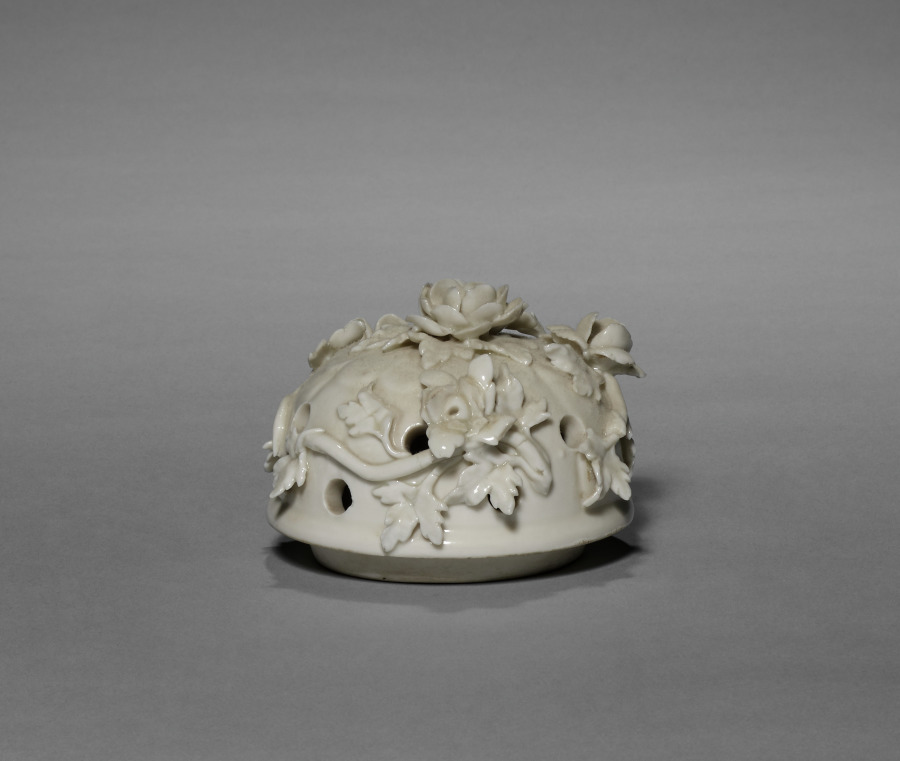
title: Potpourri Vase with Cover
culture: France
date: c. 1860–80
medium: blanc-de-chine porcelain; gilt bronze mount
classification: Ceramic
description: This vase was likely made by the celebrated Parisian ceramics firm of Edmé Samson (1810–91). To cater to the resurgence in taste for 18th-century designs, the Samson firm specialized in making reproductions of rare 18th-century European porcelains, especially those from firms that had already copied Chinese porcelains. In this case, this vase's design is taken from models produced by the Saint-Cloud factory in the 1750s after earlier Qing dynasty Chinese ceramics. However, the telltale sign that this vase is made by Samson and not Saint-Cloud is that the original would have been made from a soft-paste porcelain (fired at a lower temperature), while this example is made of hard-paste porcelain (fired at the highest temperature).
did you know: Potpourri vases always have holes in the top to let the scent of dried spices and flowers contained within freshen the air around them.